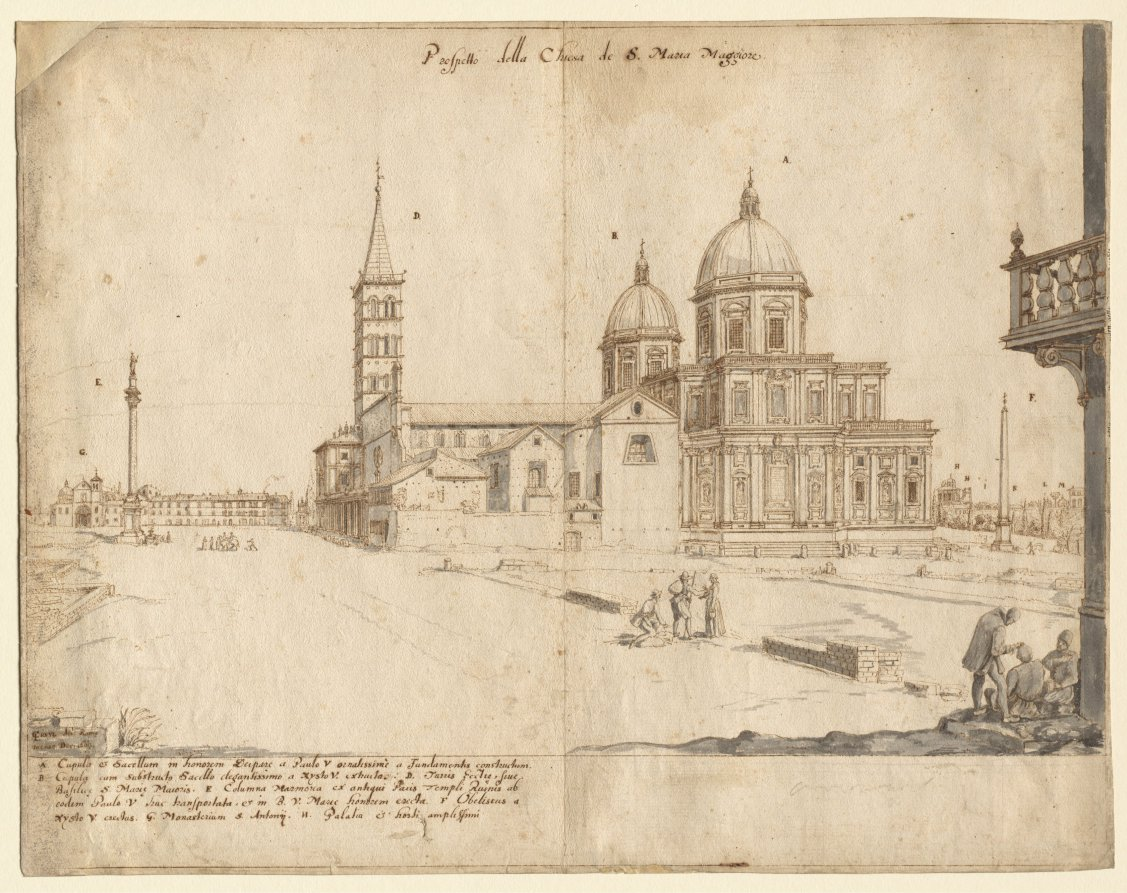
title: Eighteen Views of Rome: The Basilica of Santa Maria Maggiore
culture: Flanders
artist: Lievin Cruyl (Flemish, c. 1640-c. 1720)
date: 1664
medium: pen and brown ink and brush and gray wash over stylus and graphite; framing lines in brown ink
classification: Drawing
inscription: signed, lower left, in brown ink: [artist's monogram: LC] RVYL del: Romæ / mense Dec: 1664. ; by artist, upper center, in brown ink: Prospetto della Chiesa de S. Maria Maggiore. ; by artist, throughout composition, in brown ink: [the letters A-M] ; by artist, lower left, in brown ink: A Cupula et Sacellum in honorem Deiparæ a Paulo V ornatissimè a Fundamentis constructium. / B Cupula cum substructo Sacello elegantissimo a Xysto V. extructa. . D. Turris Eccliæ, sive / Basilicæ S. Mariæ Maioris. E Columna marmorea ex antiqui Pacis Templi Ruinis ab / eodem Paulo V huc transportata, es in B. V. Mariæ honorem erecta. F Obelistus a / Xÿsto V. erectus. G. Monasterium S. Antonij. H. Palatia et hosti amplissimi ; lower right, in graphite: [illegible] ; VERSO, upper left, in brown ink: [illegible]5 ; ON STRIPS OF PAPER MOUNTED TO VERSO, lower center, in graphite: A. 20973 ; lower right, in graphite: E .5